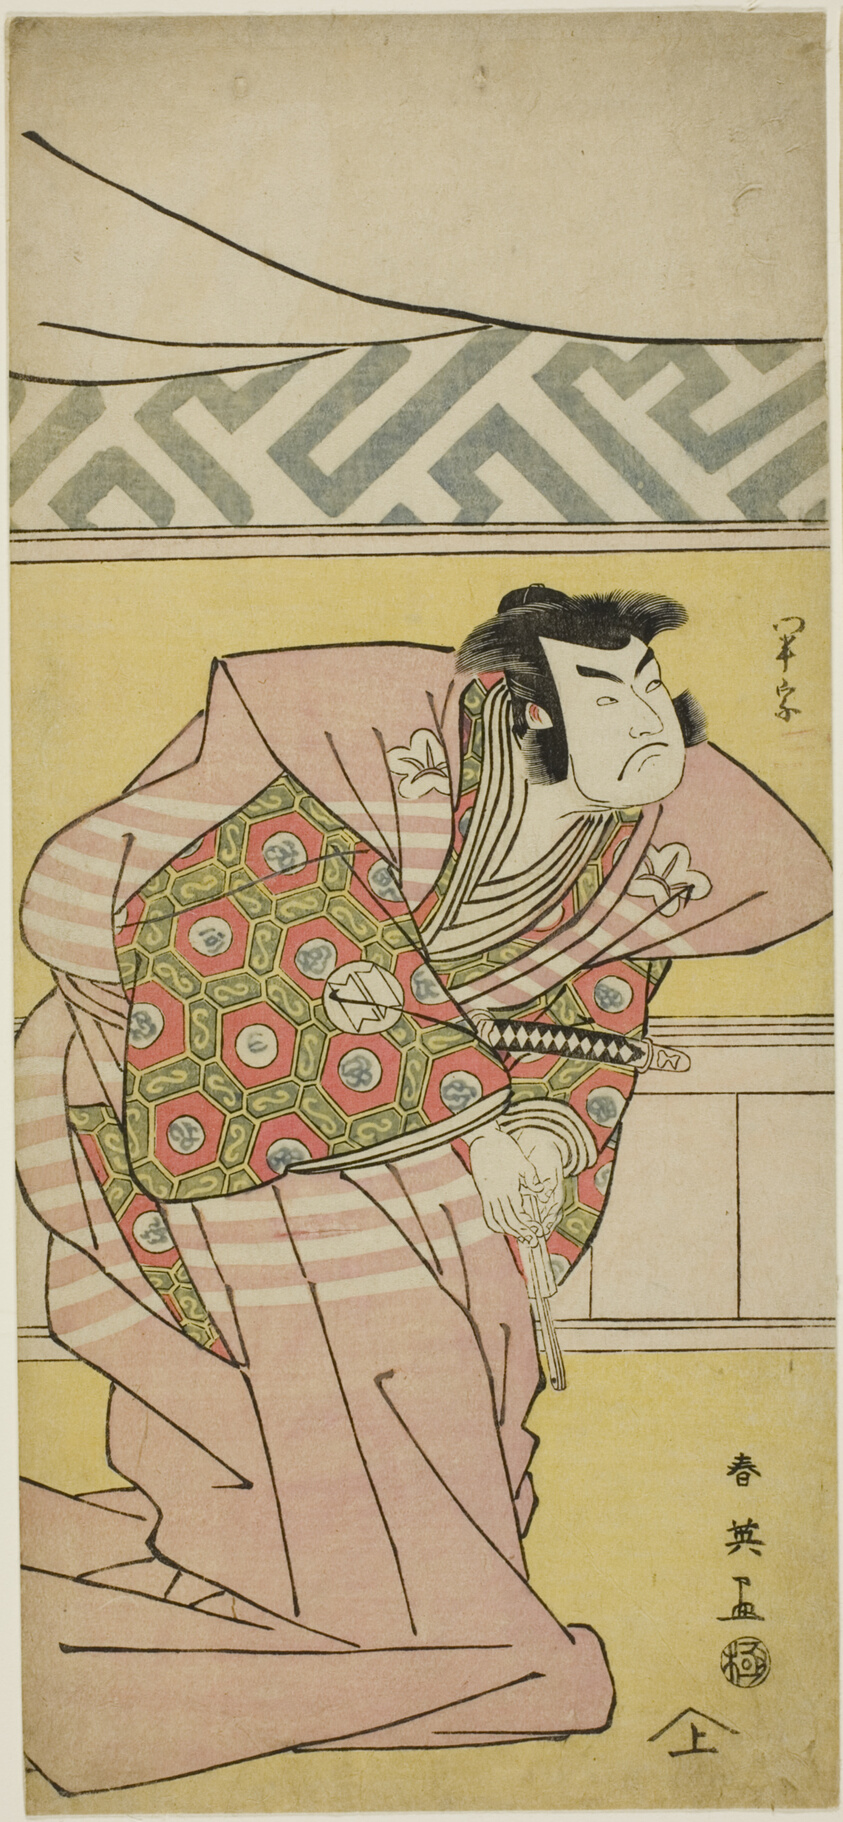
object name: Print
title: Actor Sawamura Sôjûrô III as Oda Kazusanosuke Harunaga in “Muromacho Chronicle in Kana Script” (“Kanagaki Muromachi bundan”)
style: Japanese (culture or style)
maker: Katsukawa Shun’ei; Japanese, 1762–1819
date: About 1791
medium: Color woodblock print; hosoban triptych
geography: Japan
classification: woodblock print; print; asian art